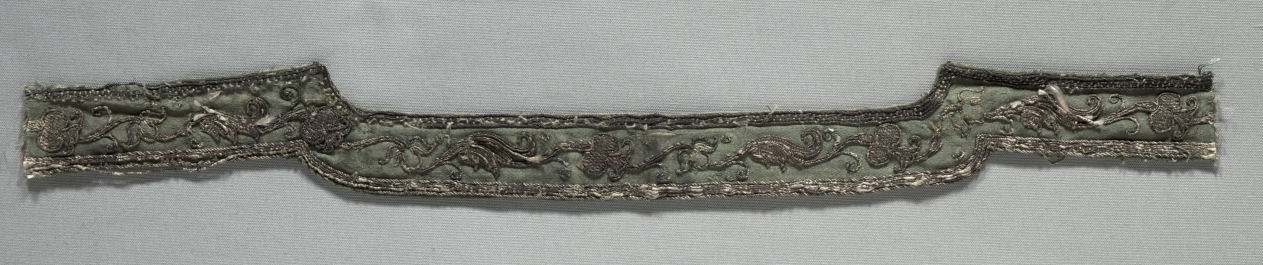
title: Apparel from a Dalmatic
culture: Italy, early 16th century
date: early 1500s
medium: embroidery; silk and metallic threads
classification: Embroidery